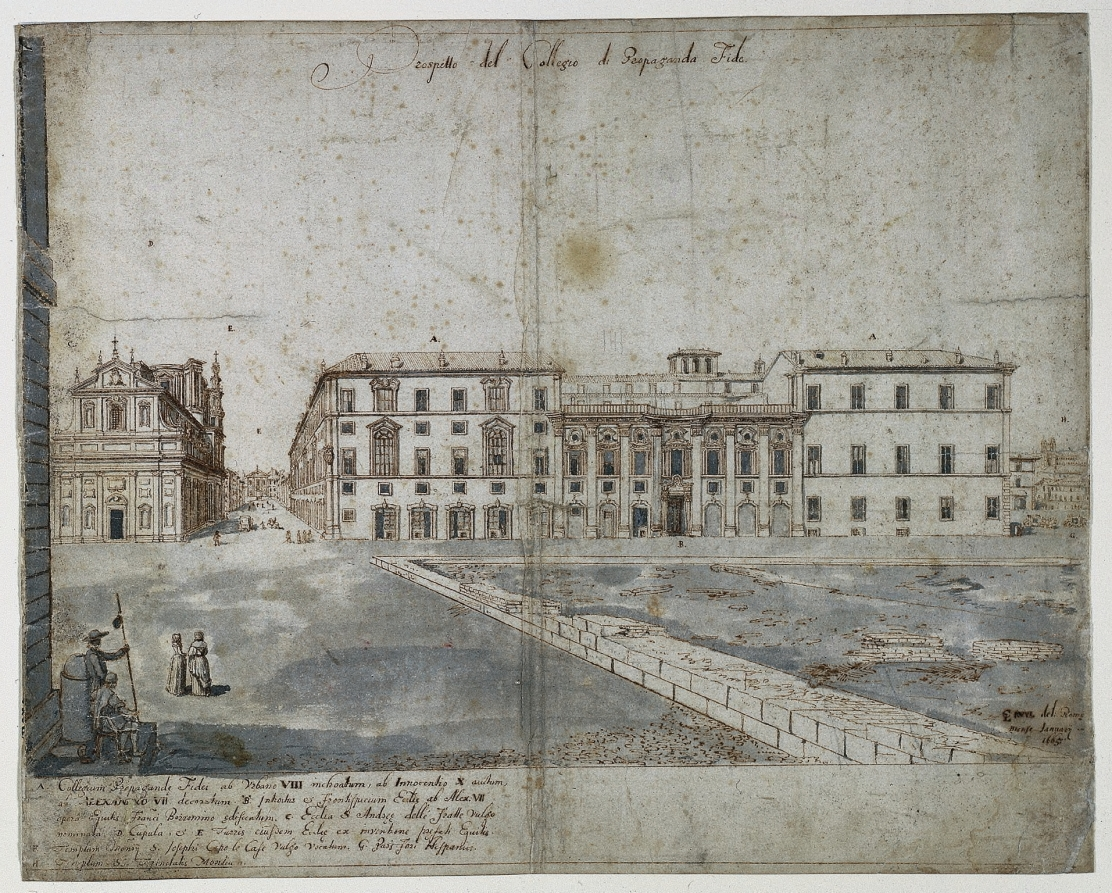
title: Eighteen Views of Rome: The Collegio di Propaganda Fide (recto)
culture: Flanders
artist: Lievin Cruyl (Flemish, c. 1640-c. 1720)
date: 1665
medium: pen and brown ink and brush and gray wash over graphite; framing lines in brown ink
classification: Drawing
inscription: signed, lower right, in brown ink: [artist's monogram: LC] RVYL del: Romæ / mense Januarij / 1665. ; by artist, upper center, in brown ink: Prospetto del Collegio di Propaganda Fide. ; by artist, throughout composition, in brown ink: [the letters A-H] ; by artist, lower left, in brown ink: A. Collegium Propagandæ Fidei ab Urbano VIII inchoatum, ab Innocentio X auctum, / ab ALEXAN[D]RO VII decoratum. B. Introitus et Frontispicium Eccliæ ab Alex: VII / operâ Equitis Frañci Borrommo edificatum. C. Ecclia S. Andreæ dellé Fratte vulgo / nominata. D. Cupula , et E Turris eiusdem Eccliæ ex inventione prefati Equitis. / F. Templum Mon~rij S. Josephi Capo le Case vulgo vocatum. G. Pars Fori Hispanici. H. Templum SS. Trinitiatis Montium.